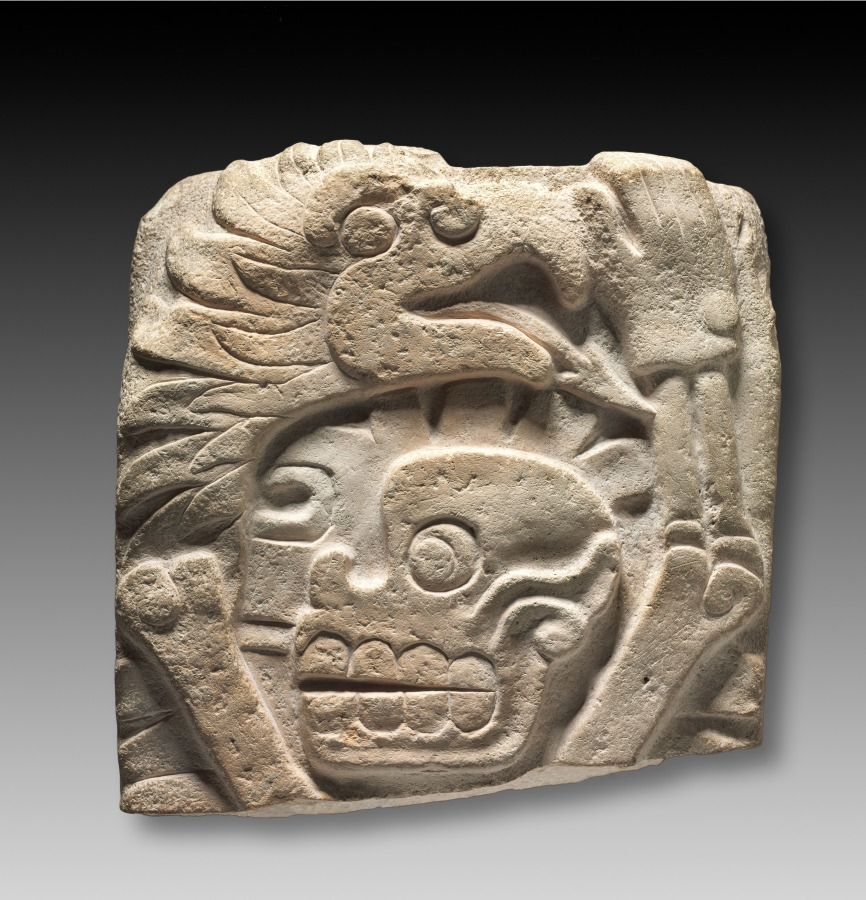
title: Stela Fragment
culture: Mexico, Veracruz?, 600-950 AD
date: 600–950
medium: limestone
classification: Sculpture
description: Figures appear on two sides of this fragmentary stela (upright stone slab carved in relief). One seems to represent a grimacing warrior who brandishes a club; arrow-like darts festoon his belt and hair. On the other side is a skeleton with one fleshed hand, perhaps a sacrificed captive. The eagle with a leaf in its mouth is a hieroglyph that may identify the captive's name.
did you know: The pointed teeth of the warrior are suggestive of dental modification, a practice known to have occurred from human remains.